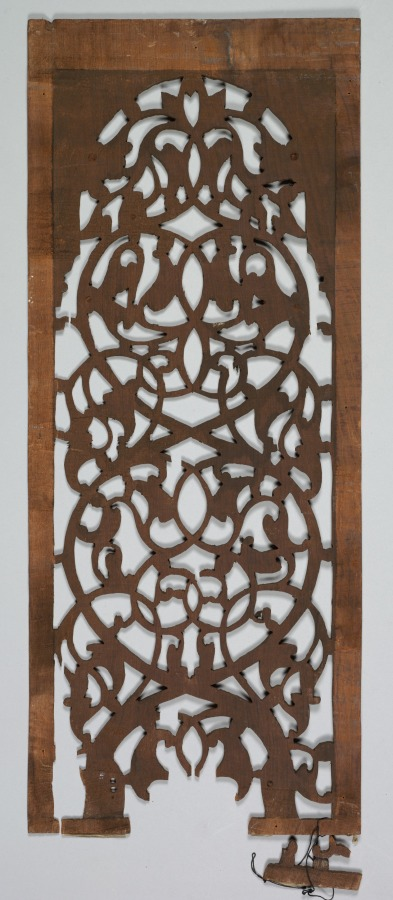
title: Carved Wood Panel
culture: India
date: 1800s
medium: wood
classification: Wood